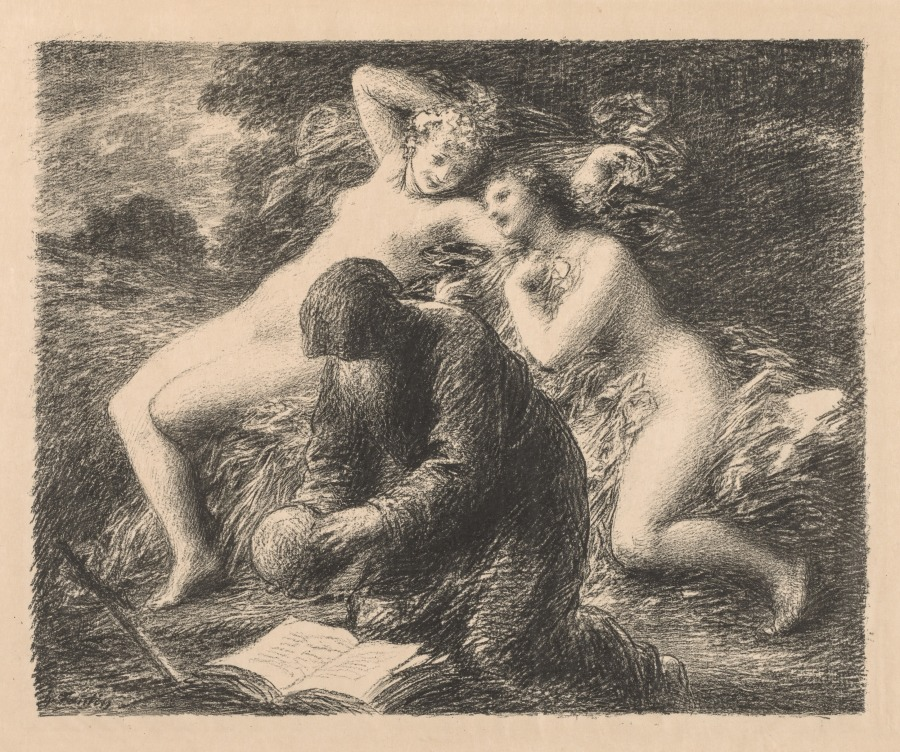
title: Temptation of St. Anthony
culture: France, 19th century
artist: Henri Fantin-Latour (French, 1836–1904)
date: 1893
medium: lithograph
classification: Print